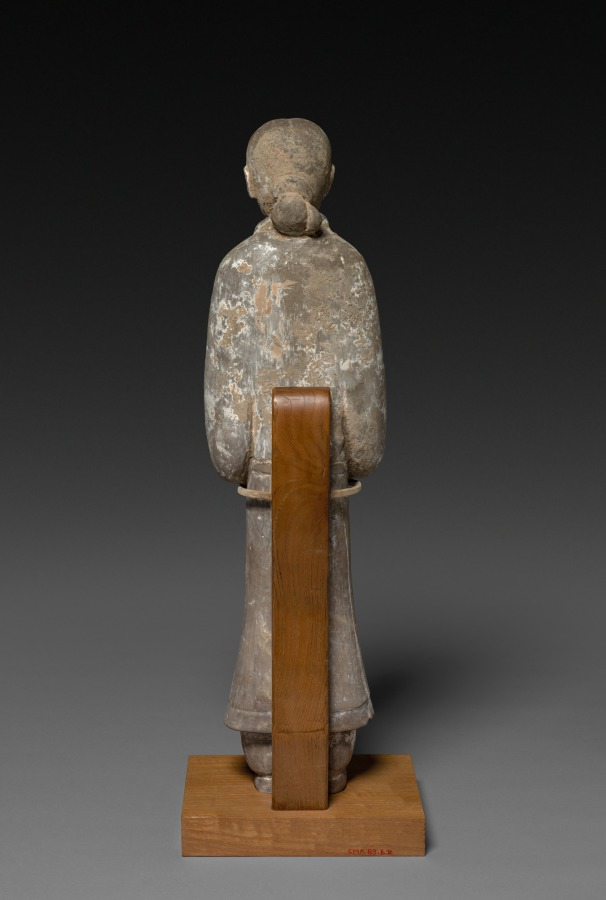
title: Female Attendant (Tomb Figurine)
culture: China, probably Shaanxi province, Western Han dynasty (206 BCE–8 CE)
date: 200s BCE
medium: gray earthenware with slip coating and traces of polychromy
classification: Sculpture